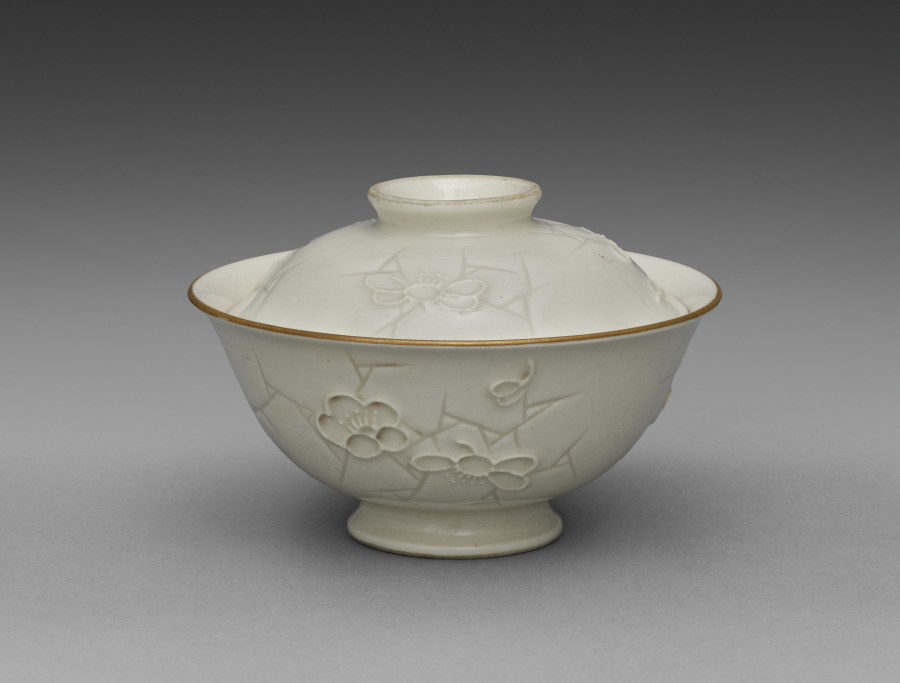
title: Covered Bowl from Dining Set with Plum Blossoms and Cracked-Ice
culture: Japan, Meiji period (1868–1912)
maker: Seifū Yohei II (Japanese, 1844–1878)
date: c. 1875–78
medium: Porcelain with molded designs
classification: Ceramic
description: Each item in this set has a delicate low-relief design of flowering plum branches over scattered, intersecting lines meant to resemble the cracked-ice surface of a frozen body of water and is signed on the base in gold pigment. While Yohei II produced many fine works in underglaze blue, like those produced by Kiyomizu Shichibei, he also made works in quite different styles later in his career, from the early 1870 s. In 1873, he was appointed purveyor to the Industrial Center of Kyoto Prefecture, a designation associated with Kyoto’s efforts to reach an international market through the port of Kobe; and from 1875 until his death, he was involved in national-level projects to present Japanese ceramics across the world. It was during this period that Yohei III was apprenticed to Yohei II, and it has been suggested that this set may in fact be an early example of Yohei III’s work, which he signed with his teacher’s name. Decorated with flowers resembling Japanese textile motifs, the set calls to mind the design of Yohei II’s pair of vases with plum blossoms in the Victoria and Albert Museum. Here, the elaborate trees created for a formal public exhibition setting have been translated into the approachable blossoms of the genteel domestic environment. While the designs are consistent across the pieces, each raised flower petal and pistil and each incised line in the ice was done by hand, so the cups, bowls, and dishes are similar yet unique. The bottoms of two boxes once identified the set’s owner, but the information has been deliberately obscured with black ink. However, inscriptions still visible appear to indicate two occasions, once at the end of July 1886 , and once again in June 1916 , when parts of the set were requested from Hokura in Niigata Prefecture. The location corresponds to a neighborhood in the present-day city of Jōetsu. The surname Tsuji 辻 also appears on a paper tag affixed to one of the box cloths. Future research may possibly reveal more about their provenance. A vase by Yohei III in a private collection combines the formal grandeur of the Yohei II vases in the Victoria and Albert Museum with the gentler design of this dining set, placing flowering plum trees against soft, scalloped-edge clouds resembling those in golden screens.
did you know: The dining wares have a creamy white coloration that the four boxes containing them identify as Korean in style.